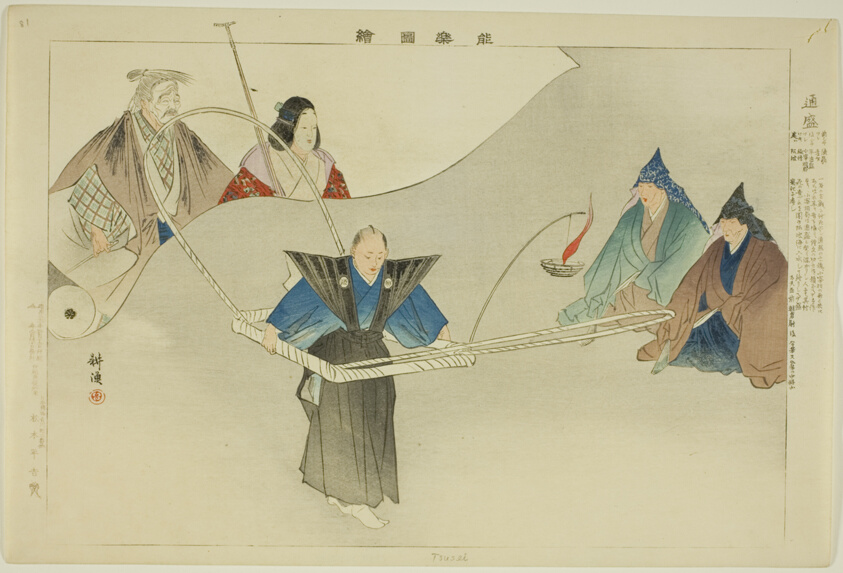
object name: Print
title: Tsusei, from the series "Pictures of No Performances (Nogaku Zue)"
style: Japanese (culture or style)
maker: Tsukioka Kogyo; Japanese, 1869-1927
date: 1898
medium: Color woodblock print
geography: Japan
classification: woodblock print; print; asian art